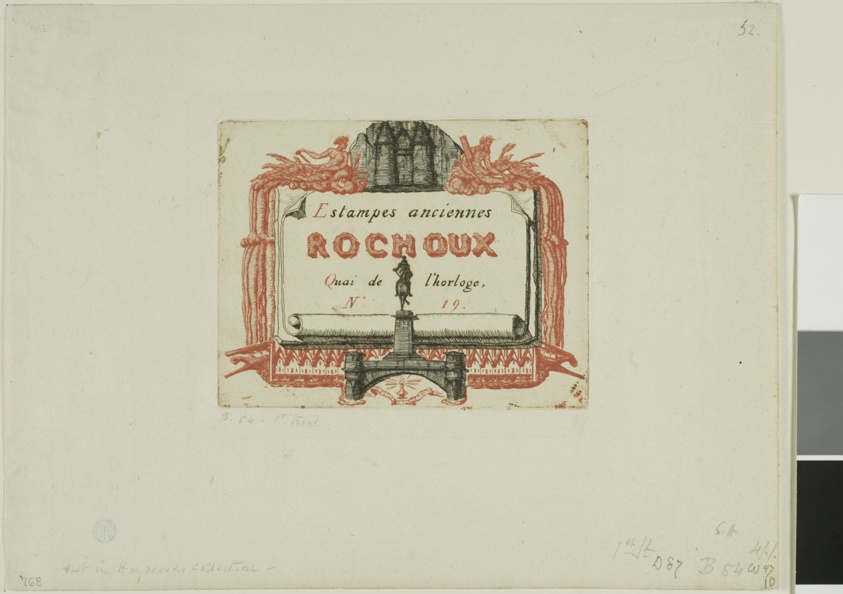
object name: Print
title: Address-Card of the Printseller, Rochoux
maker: Charles Meryon (French, 1821-1868); printed by Auguste Delâtre (French, 1822-1907)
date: c. 1855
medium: Etching, from two plates, one printed in black and the other in red, on ivory laid paper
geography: France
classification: etching; print; prints and drawing